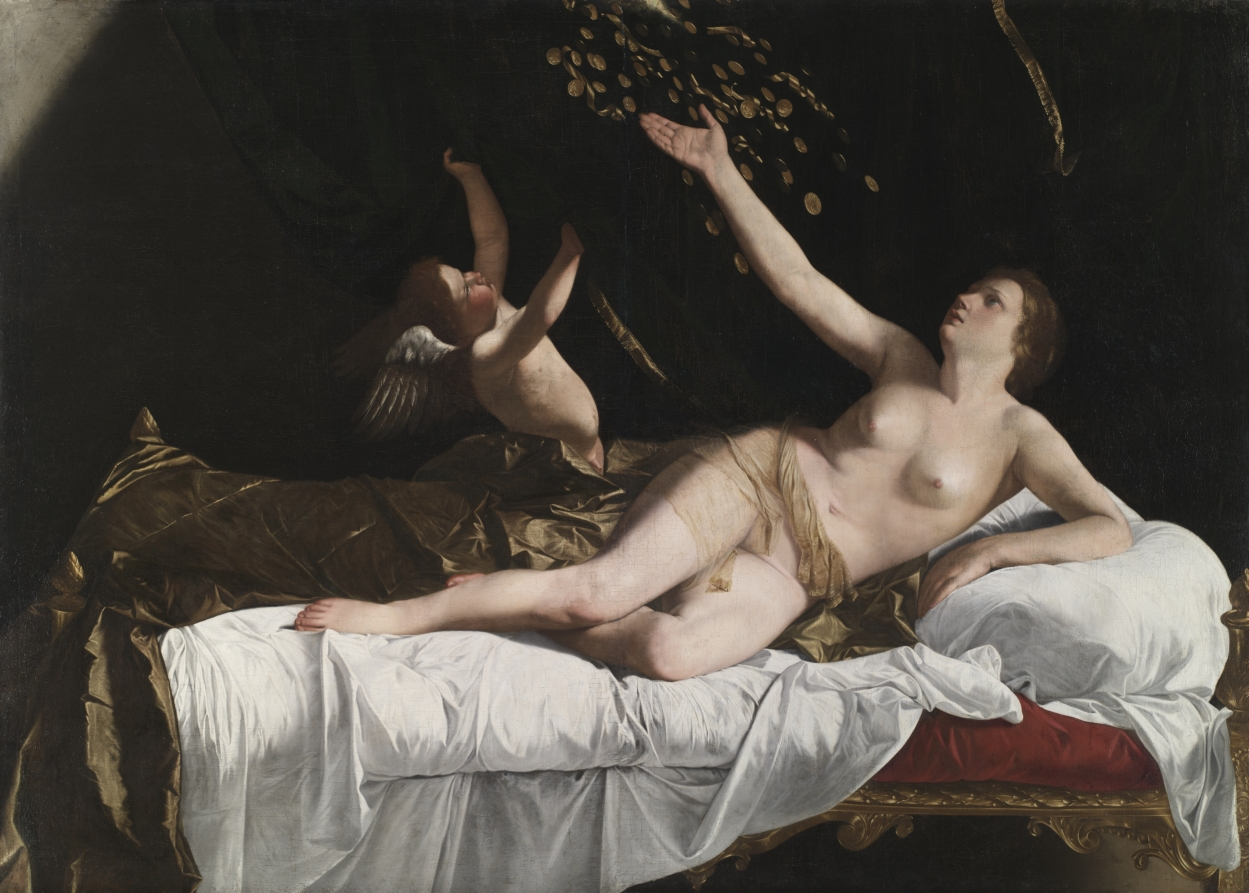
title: Danaë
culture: Italy, 17th century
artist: Orazio Gentileschi (Italian, 1563–1639)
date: c. 1623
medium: oil on canvas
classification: Painting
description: Danaë’s father feared a prophecy that his grandson would kill him, so he imprisoned his daughter to protect her from suitors. Yet Jupiter, king of the gods, fell in love with Danaë, and he came to her in the form of gold streaming from the sky. Gentileschi adopted Caravaggio’s method of painting directly from models, pulled to the front of the picture plane, which gives the painting a startling, tangible quality. However, the graceful way he handled paint and human gestures lends the work a poetic quality unique to the artist.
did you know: The gauzy scarf draped over Danaë was a studio prop present in many of Orazio's paintings.